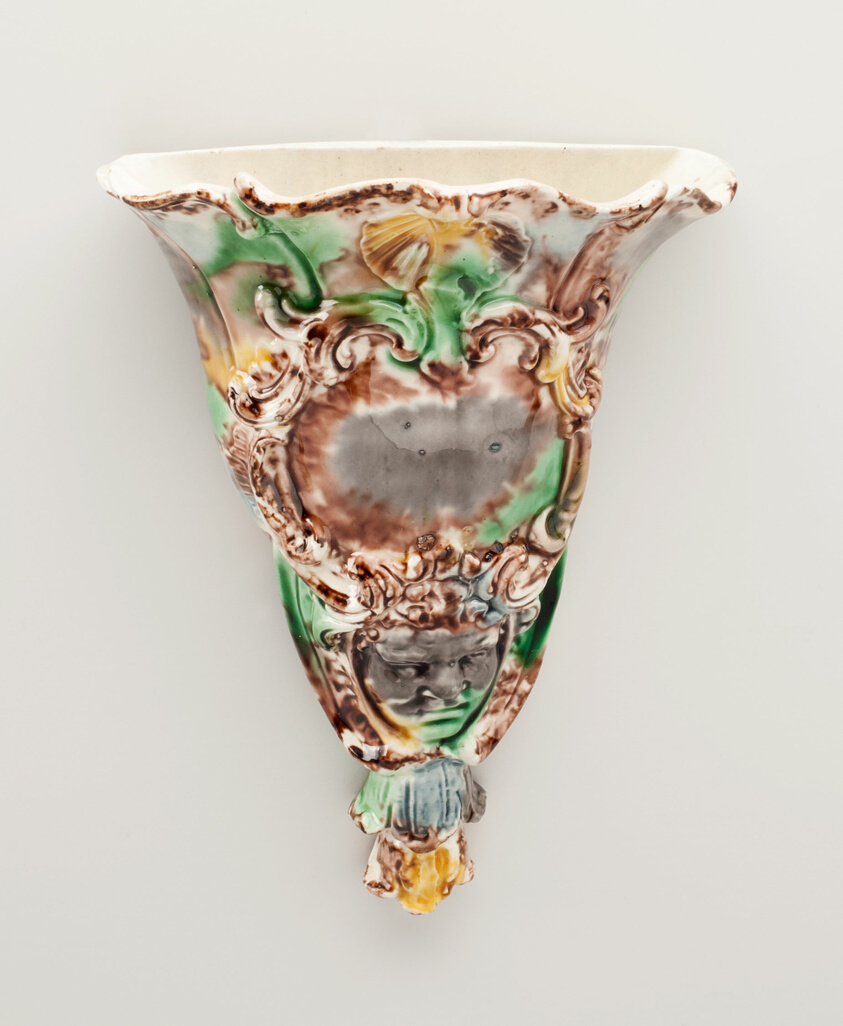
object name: Ceramics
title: Wall Pocket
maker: Staffordshire, England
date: 1770/80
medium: Lead-glazed earthenware (creamware)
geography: Staffordshire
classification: earthenware; ceramics; creamware; european decorative arts; lead-glazed earthenware